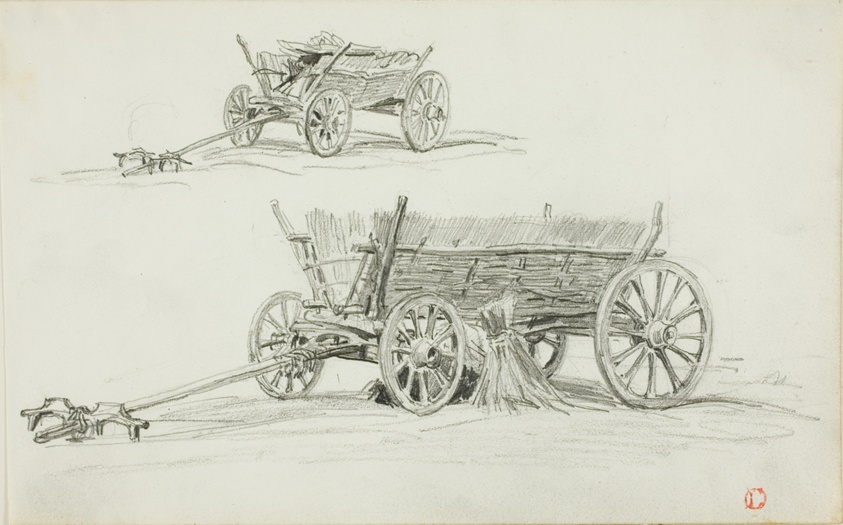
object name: Drawing and Watercolor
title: Two Sketches of an Ox Cart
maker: Charles François Daubigny (French, 1817-1878)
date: c. 1850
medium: Graphite on ivory wove paper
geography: France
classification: graphite; drawings (visual works); prints and drawing